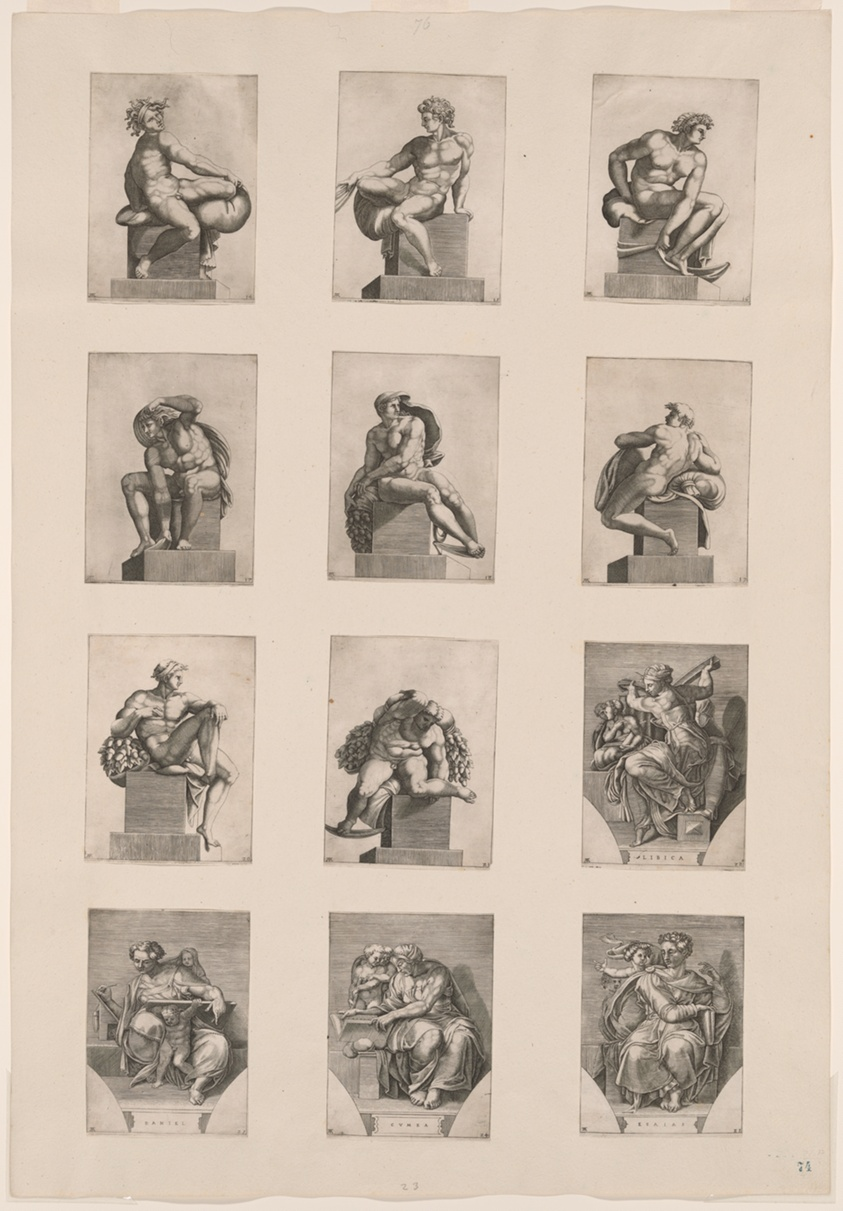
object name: Print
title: Figures from the Ceiling of the Sistine Chapel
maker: Adamo Scultori (Italian, c. 1530–1585); after Michelangelo Buonarroti (Italian, 1475–1564)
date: 1550/65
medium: 12 engravings in black on cream laid paper, tipped onto album sheet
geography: Italy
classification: engraving; paper; prints and drawing; print